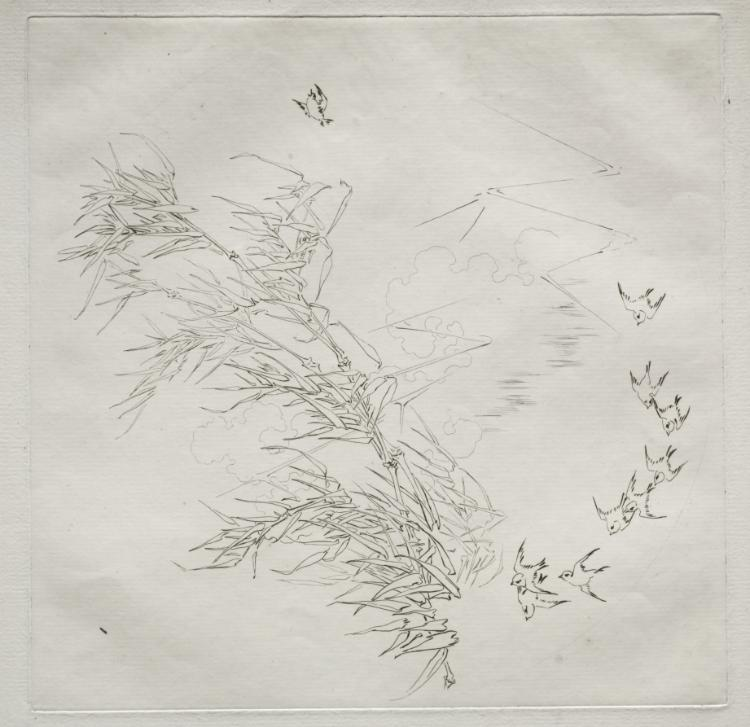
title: Parisian Service (Haviland service): The Storm (no. 8)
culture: France, 19th century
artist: Félix Bracquemond (French, 1833–1914)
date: 1875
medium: etching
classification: Print